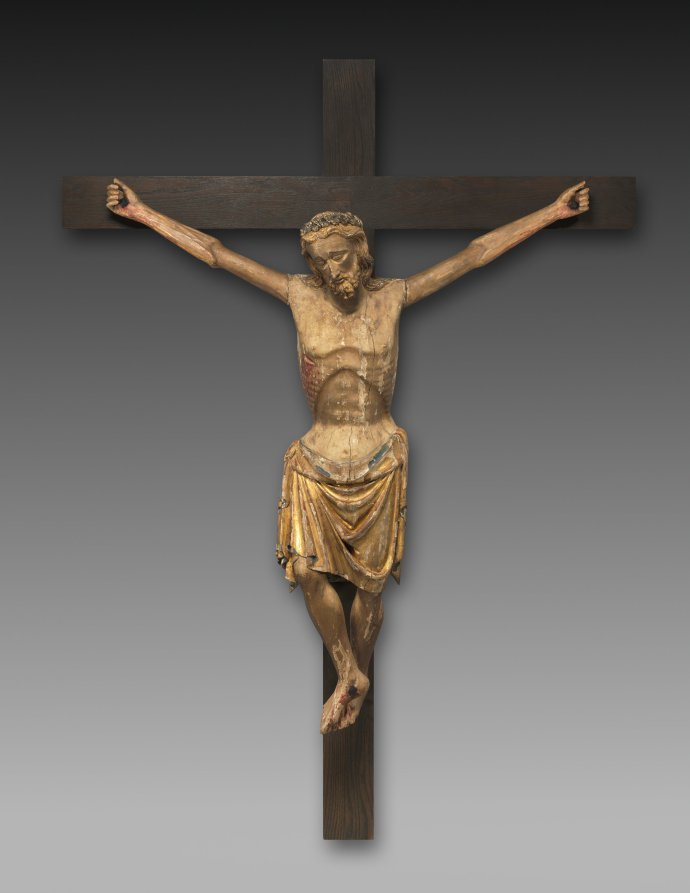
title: Crucified Christ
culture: Spain, Navarre?, late 14th century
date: late 1300s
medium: painted and gilded wood (poplar)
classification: Sculpture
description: This carved wooden corpus of Christ was covered with a layer of linen and painted with vivid colors. Given its large scale it would have been intended for display in a church. Most likely it was suspended high over an altar facing the choir. During the Middle Ages, a monumental cross was often hung above the altar, and a smaller cross placed upon it. While not required by the liturgy, these crosses were visible symbols of the subject and focus of the Mass. The style of the corpus would suggest it comes from Navarre in northeast Spain.